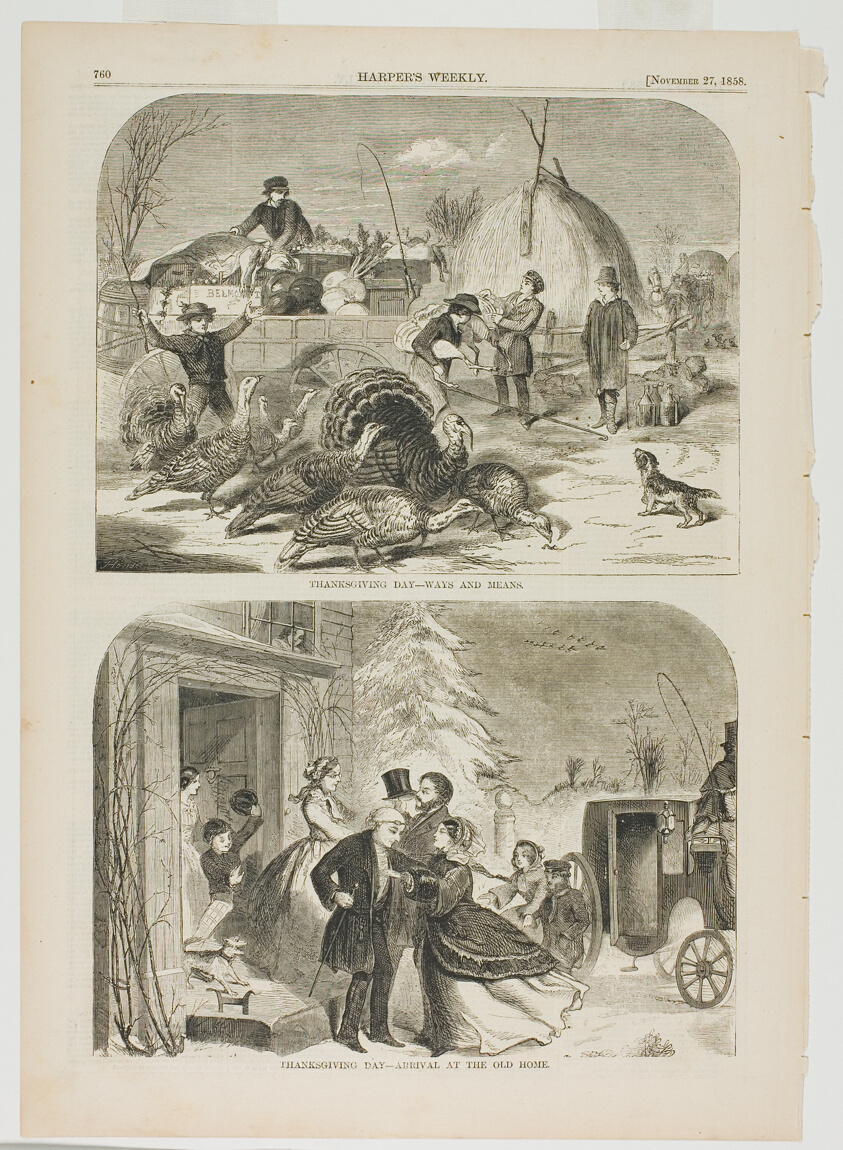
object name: Print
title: Thanksgiving Day—Ways and Means and Thanksgiving Day—Arrival at the Old Home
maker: Winslow Homer (American, 1836-1910); published by Harper's Weekly (American, 1857-1916)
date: published November 27, 1858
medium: Wood engravings on paper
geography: United States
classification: wood engraving; print; prints and drawing